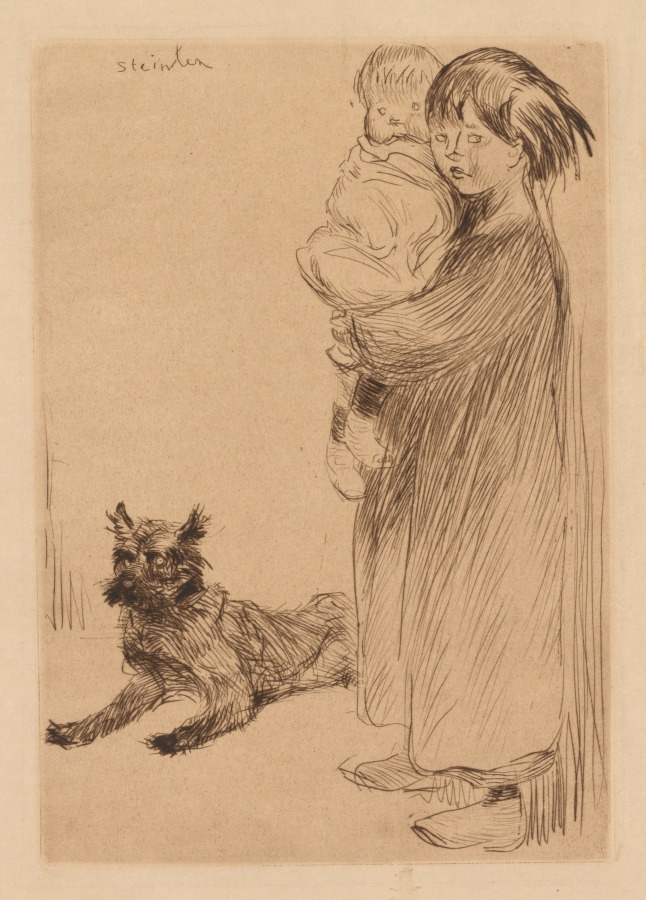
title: The Big Sister (La Grande Soeur)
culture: Switzerland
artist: Théophile Alexandre Steinlen (Swiss, 1859–1923)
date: 1913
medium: drypoint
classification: Print